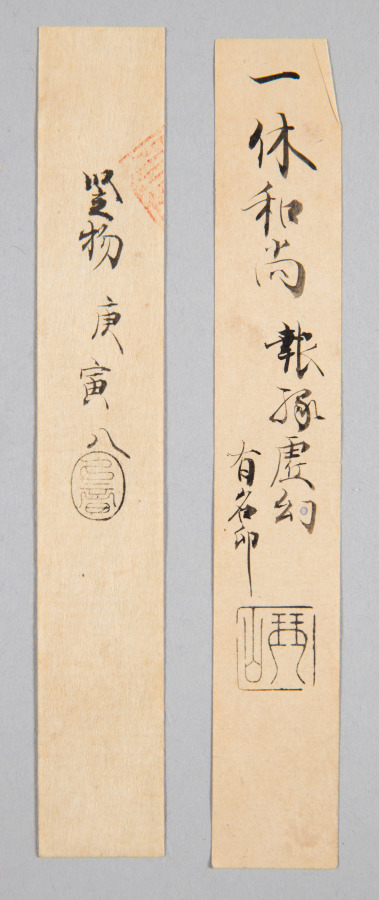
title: Reflections of Priest Foyen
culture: Japan, Muromachi period (1392–1573)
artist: Ikkyū Sōjun (Japanese, 1394–1481)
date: 1400s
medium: hanging scroll, ink on paper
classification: Painting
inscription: signed: "Kido nanasei son, Ikkyūshi Sōjun sho (Written by Ikkyū Sōjun, the seventh generation of Kido)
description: Left by his mother at a small Zen temple in Kyoto at the age of six, Ikkyu later drew on his early studies and experiences for his writings, which focused on his keen interest in the Chinese classics. Poetry in particular was a favorite subject and images from classical poetry or passages from favorite poems or commentaries frequently provided Ikkyu with the core ideas for his own work. A rare example of his calligraphy, this narrow scroll contains a verse in eight phrases, each comprising four characters. The whole verse is organized in three towering lines of brusque, emphatic calligraphy augmented by Ikkyu's signature-the two lines of running script in the lower left corner. The text refers to a passage included in the Chronicle of the Zen Sect that contains a cautionary reminder attributed to the legendary Chinese monk Foyen Qingyuan (1067-1120), long revered in Japan. The initial phrase begins: "Life is a mirage."